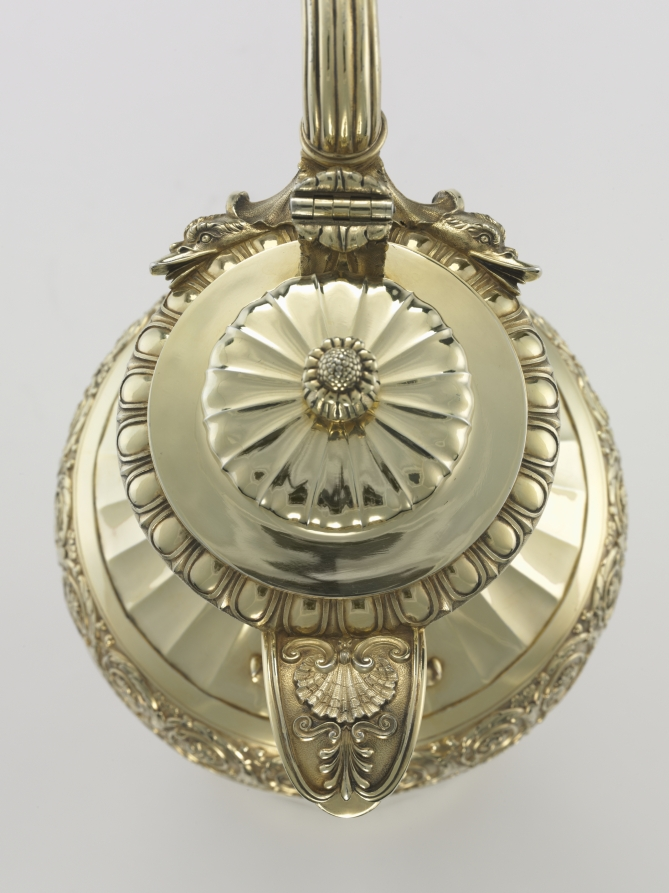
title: Wine Ewer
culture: England, London, 19th century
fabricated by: Paul Storr (British, 1771–1844)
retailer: Rundell, Bridge and Rundell (British, 1797–1834)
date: 1815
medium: silver gilt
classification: Silver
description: Silver was firmly established as a symbol of wealth, status, and power by the 1800s. Throughout history, styles largely followed the taste of the reigning monarch and thus reflected the political and social alliances that underpinned the aristocracy in Britain. The frieze of scrolls surrounding the handle, the acanthus leaf supporting the lip, and the dolphin heads framing the hinge on this ewer are characteristic of a bolder expression of classical taste favored during the Regency period (1811–20).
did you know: The vine-leaf border along the top of this ewer was inspired by Roman silver from antiquity and popularized by Paul Storr in the 1800s.